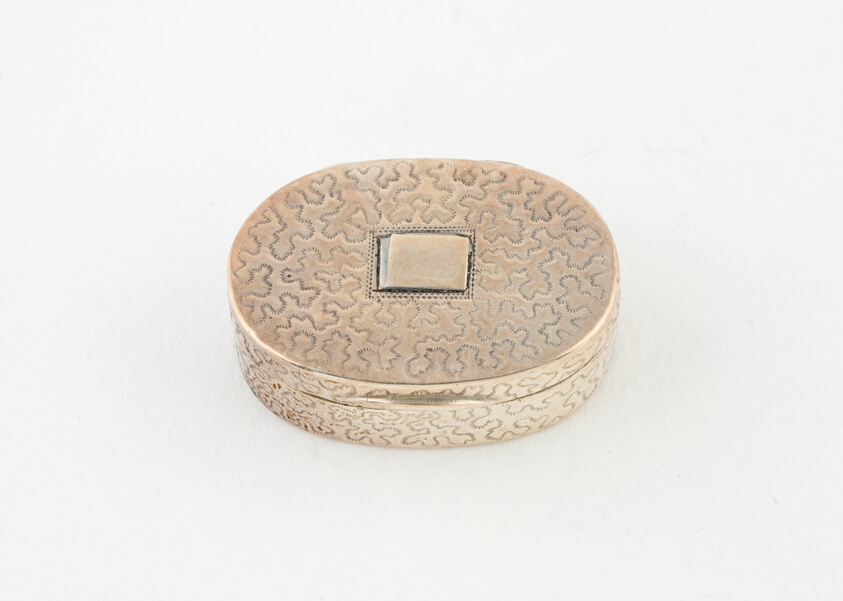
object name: Metalwork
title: Vinaigrette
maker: Possibly R. Needham; London, England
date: c. 1802/03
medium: Silver and silver gilt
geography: London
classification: container for personal use; vinaigrette (container for health care); european decorative arts; metalwork; silver; decorative object/ornament